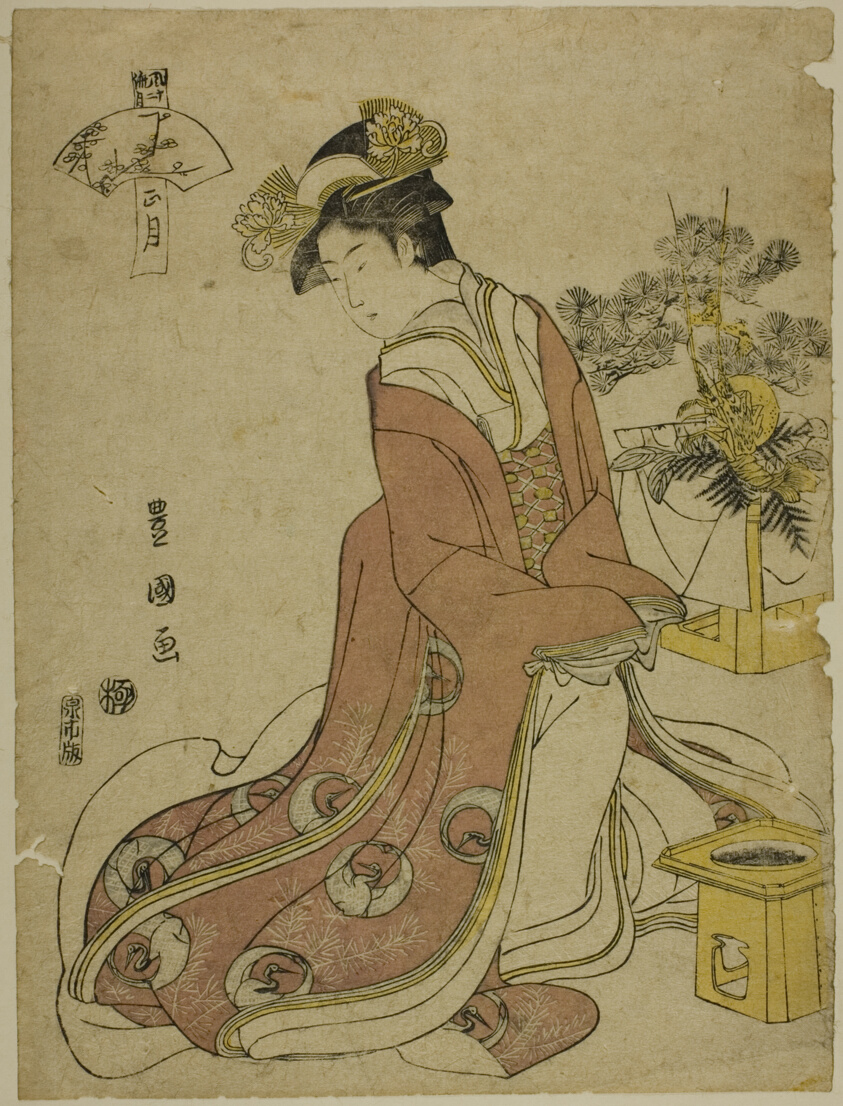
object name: Print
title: The First Month (Sho gatsu), from the series "Fashionable Twelve Months (Furyu junikagetsu)"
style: Japanese (culture or style)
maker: Utagawa Toyokuni I 初代 歌川 豊国; Japanese, 1769–1825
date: c. 1793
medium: Color woodblock print; chuban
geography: Japan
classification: woodblock print; print; asian art